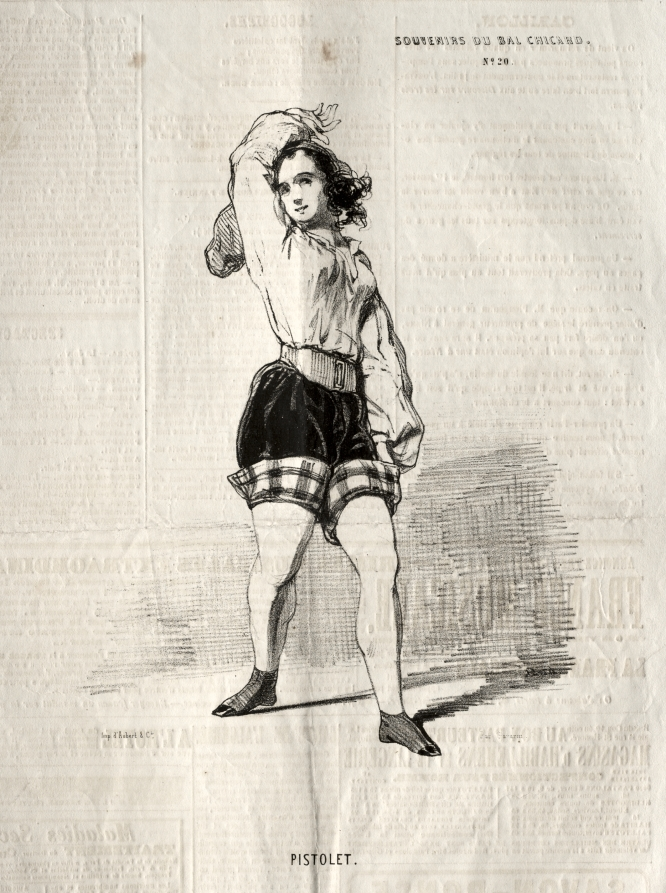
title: Souvenirs du Bal Chicard: Pistolet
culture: France, 19th century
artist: Paul Gavarni (French, 1804–1866)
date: 1843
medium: lithograph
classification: Print